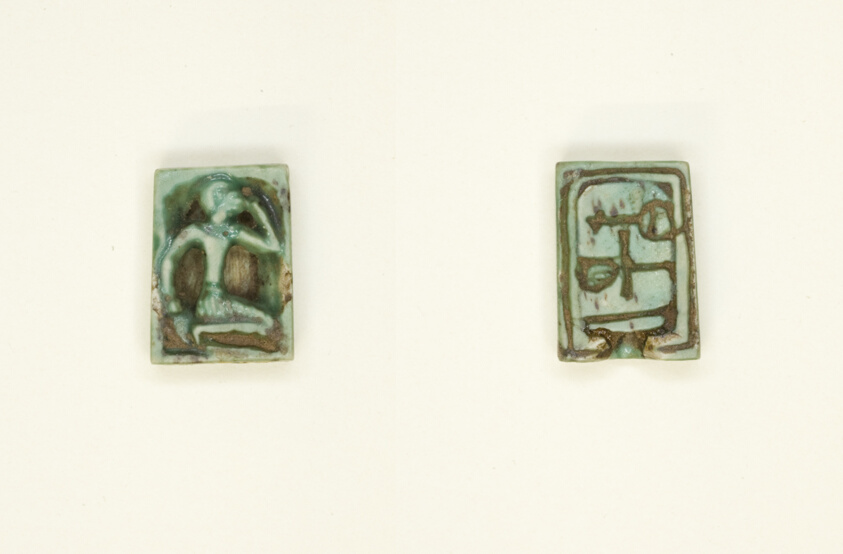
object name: Costume and Accessories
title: Plaque: Man with Hand to Head/Nefer, Ankh, Nb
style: new kingdom, eighteenth dynasty, egyptian, ancient, nineteenth dynasty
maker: Egyptian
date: New Kingdom, Dynasties 18–19 (about 1550–1186 BCE)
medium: Glazed steatite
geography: Egypt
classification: plaque (flat object); amulet; ancient art; costume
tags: men, Hieroglyphs